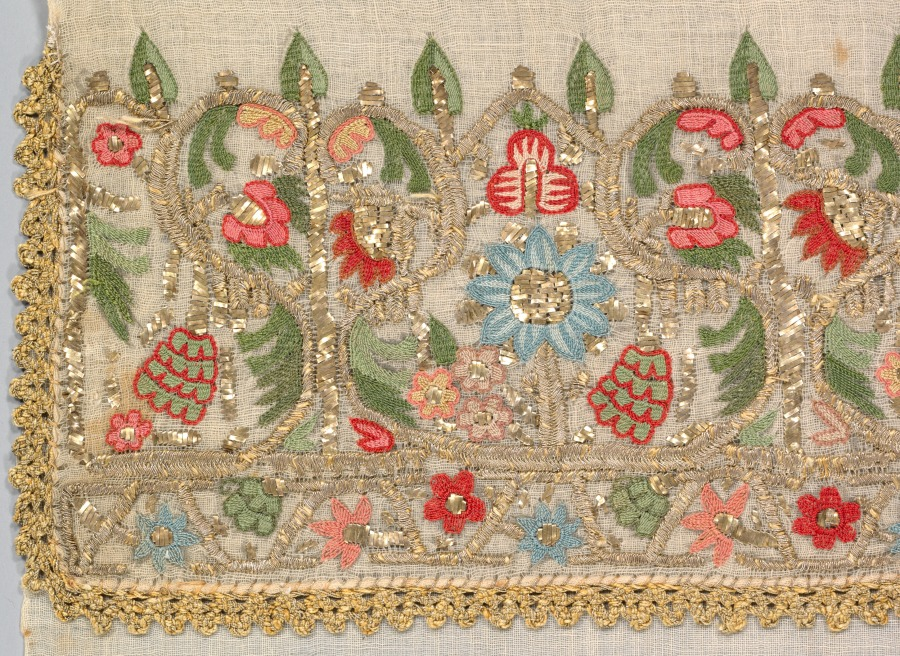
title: Embroidered towel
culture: Turkey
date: 1800s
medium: plain weave: linen; embroidery, double-running stitch: silk, gilt-metal strips and thread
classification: Embroidery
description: Fine Turkish towels with beautiful floral decoration embroidered across each end are often reversible, and their quality revealed the owner’s wealth and status. A lady was required by Turkish etiquette to use a napkin “daintily over the tips of her fingers,” lest she lose her social standing. Towels were not only essential components of everyday life but also gifts, prizes, and decorations. Embroideries could also depict images of daily life. Colorful tents and buildings in floral landscapes, here enriched with shiny gilt-metal strips, adorn the four sides of a head scarf that was worn either folded or unfolded and fastened beneath the chin. Square embroideries also served to wrap gifts, letters, and objects; the 19th-century English traveler Charles White commented that “no present is made . . . unless folded in a handkerchief, embroidered cloth, or piece of gauze. The more rich the envelope, the higher the compliment to the receiver.”